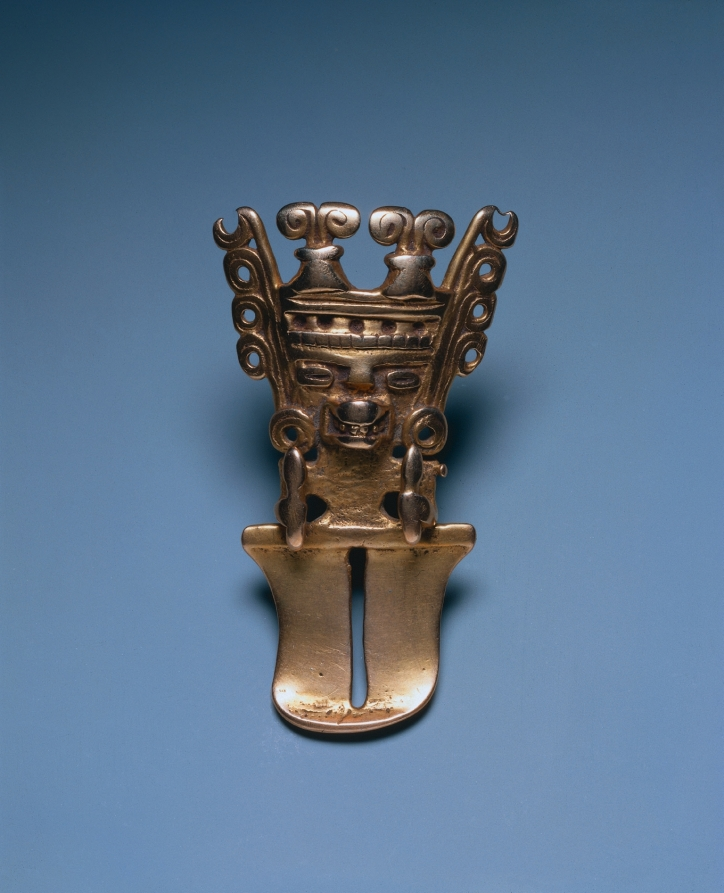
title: Figurine Pendant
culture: Colombia, Quimbaya or Yotoco style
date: c. 400–1000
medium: cast gold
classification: Metalwork